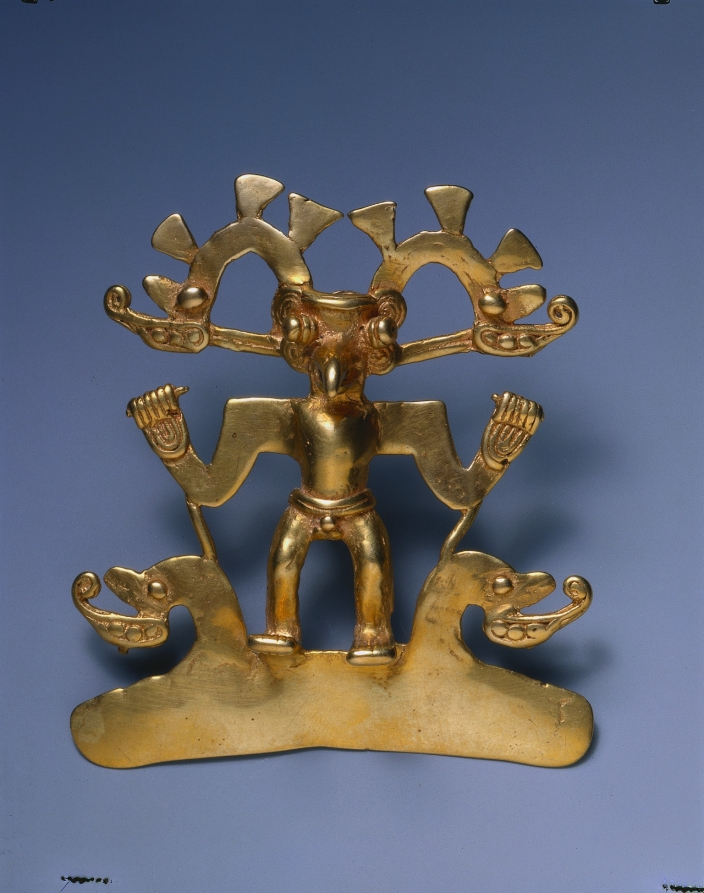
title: Bird-Man Pendant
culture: Western Panama, or Diquís, Costa Rica, Veraguas-Gran Chiriquí or Diquís Style, 8th-16th Century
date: c. 700–1550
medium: cast and hammered gold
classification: Metalwork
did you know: In the Panama-Costa Rica region, gold ornaments were associated with political and religious authority.